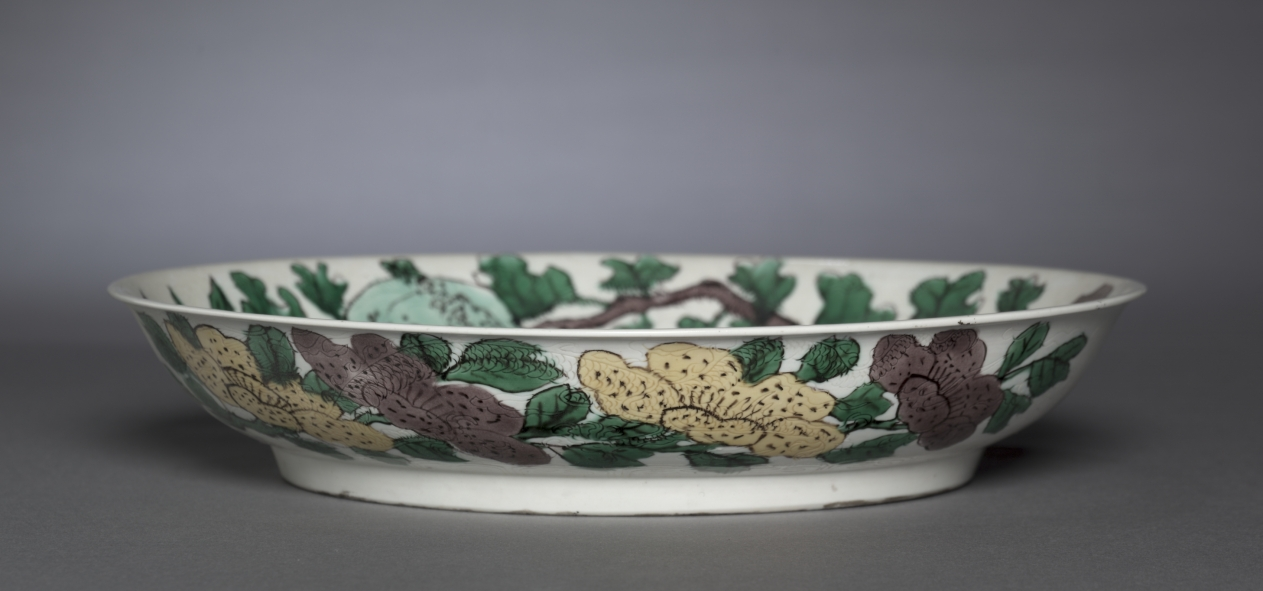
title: Dish with Dragons, Pomegranates, and Peaches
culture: China, Jiangxi province, Jingdezhen, Qing dynasty (1644-1911), Kangxi mark and period (1662-1722)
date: 1662–1722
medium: Porcelain with incised and enamel decoration, susancai ware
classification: Ceramic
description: Various techniques are applied to the decoration of susancai or "plain three-color" ware. The hidden dragons are incised, over which are painted decoration of fruit and flower sprays outlined with black pigment and colored with yellow, green, turquoise, and purplish brown enamels. The ground is filled with ivory enamel over unglazed clay.